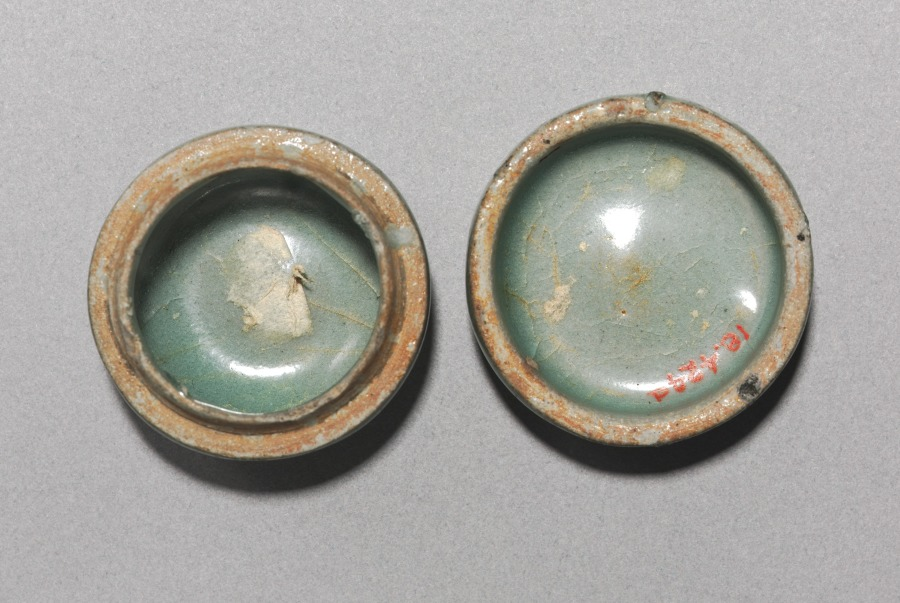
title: Box and Cover with Inlaid Crane Design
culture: Korea, Goryeo dynasty (918–1392)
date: 1200s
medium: celadon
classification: Ceramic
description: Celadons, spoons, seals, and bronze mirrors were the most common burial objects in tombs during the Goryeo period (918-1392). Once used to contain color powder, rouge and eyebrow gel for makeup, this small container was one of the standard goods that furnished elites' tombs. Goryeo-period women and men used the grain powder of rice or millet for whitening their skin, safflower extract for rouge, and plant ash or soot for eyebrow gel. Yet, natural-looking make-up seems to have been the most favorable one in Korea according to the travelogue by Xu Jing (1091-1153), the Chinese diplomat who visited Korea in 1123.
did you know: This ceramic container was used to store either incense or cosmetics.